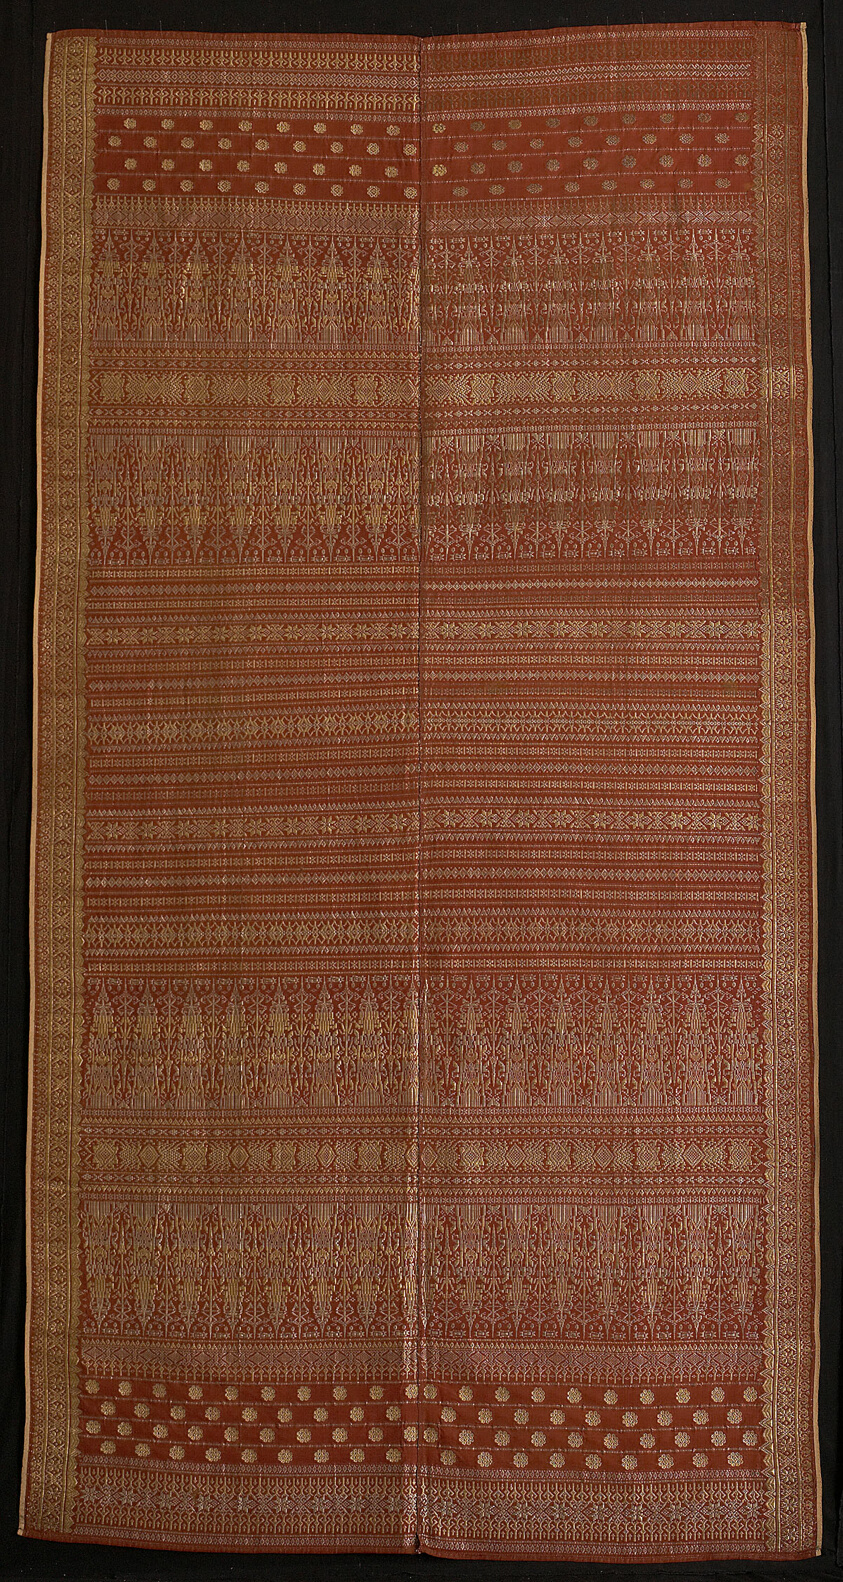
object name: Religious/Ritual Object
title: Ceremonial Shoulder Cloth (Kain songket lepus)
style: indonesian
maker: Malay; Indonesia, South Sumatra, Lampung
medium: Two widths joined: silk and silvered-and gilt-metal threads wrapped cotton, plain weave with supplementary patterning and brocading wefts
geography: Indonesia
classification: textile; weaving; ritual objects